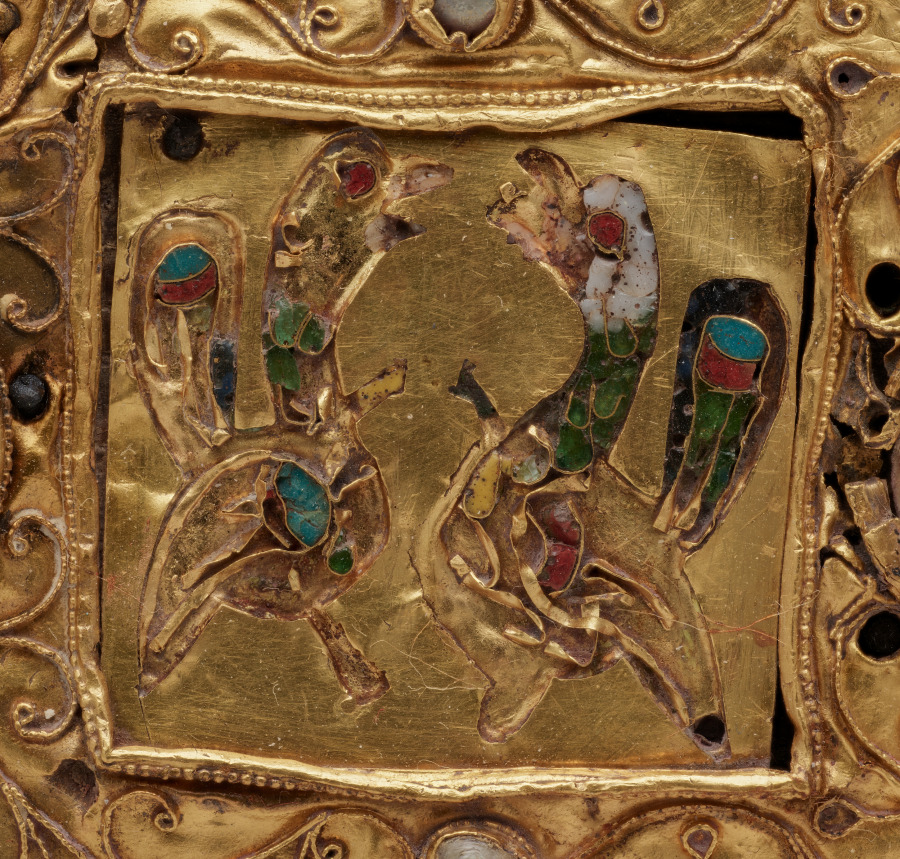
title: Ceremonial Cross of Count Liudolf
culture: Germany, Lower Saxony?, Romanesque period, 11th century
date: shortly after 1038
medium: gold: worked in repoussé; cloisonné enamel; intaglio gems; pearls; wood core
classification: Metalwork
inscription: translation of the inscription on back: Relics of the Holy Bishop Valerius, of the Holy Martyr Pancratius, of the Stone which was laid on the tomb of the Lord. This Gertrude had made for the spiritual welfare of Count Liudolf.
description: This precious gold cross was commissioned by Countess Gertrude (died 1077) and given to the church of Saint Blaise following the death of her husband, Count Liudolf of Brunswick (died 1038). The cross is decorated with a large oval-shaped chalcedony at its center and with slightly smaller rock crystals at its terminal ends. Fine but fragmentary cloisonné enamel plaques with pairs of confronting peacocks, symbols of immortality, appear at the center of each cross arms. They are set within an intricate system of filigree wire decoration imitating tendrils. Numerous pearls, three large intaglio gems, and various precious and semiprecious stones complete the decoration of the cross. Concealed behind the enamel plaque on the upper cross arm are relics of Saints Valerius and Pancratius as well as a fragment from the stone that sealed the Sepulcher of the Lord. The back of this cross is very worn, making it difficult to recognize the main features of its repoussé decoration. Faintly visible at the center is the Lamb of God, a symbol of Christ, with a cross-shaped halo. Depicted at the end of the cross arms are the symbols of the four Evangelists. A Latin inscription above the Lamb of God identifies the relics concealed behind it, namely "relics of the saintly bishop Valerius, of Pancratius martyr, [and] of the stone that was placed above the tomb of the Lord." A second inscription below states, "This [work] was commissioned by Gertrude for the soul of Count Liudolf," revealing the identity of the cross's patron and the approximate date of its commission.